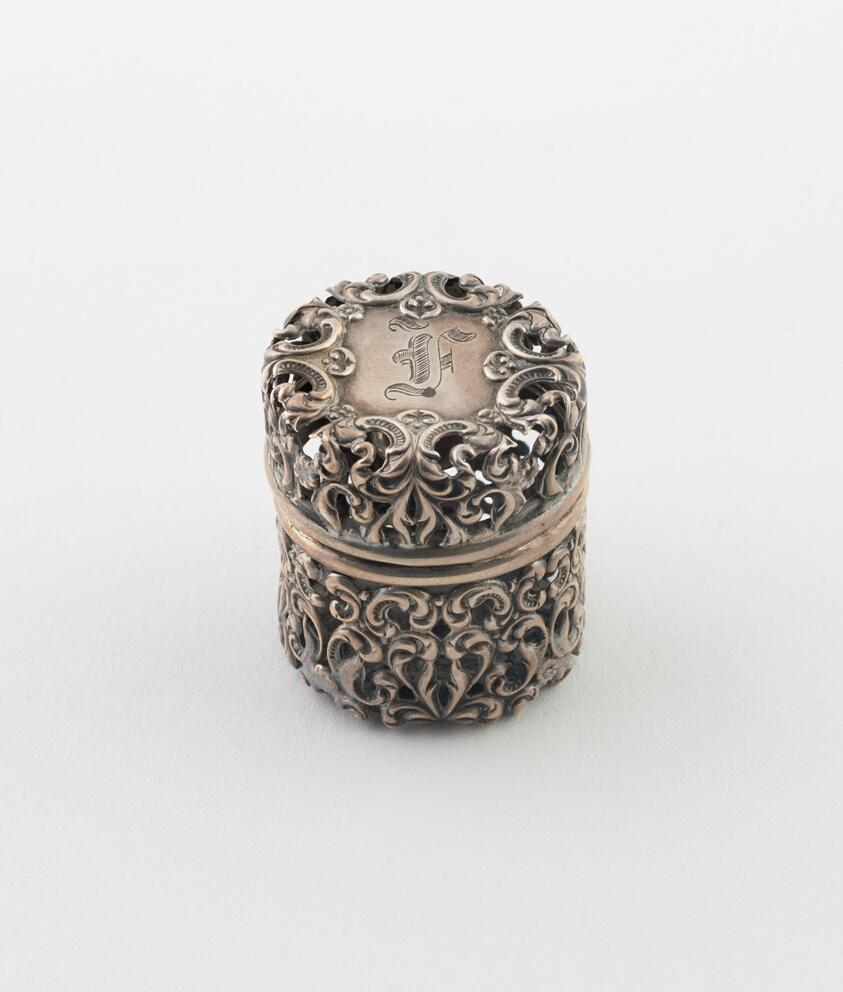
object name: Metalwork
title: Tape Measure Drum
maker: Possibly United States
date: c. 1890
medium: Silver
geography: United States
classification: container for personal use; box; european decorative arts; metalwork; silver; decorative object/ornament